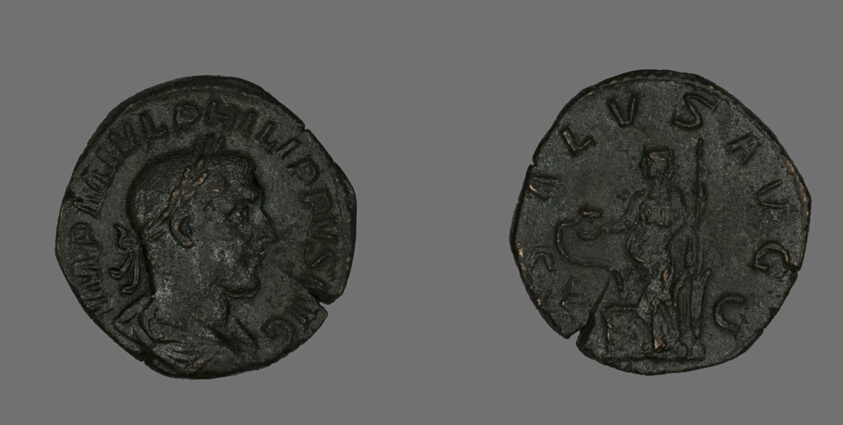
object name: Coin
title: Sestertius (Coin) Portraying Philip the Arab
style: roman (ancient, style or period), ancient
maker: Roman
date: 244-249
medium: Bronze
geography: Roman Empire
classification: coin; ancient art